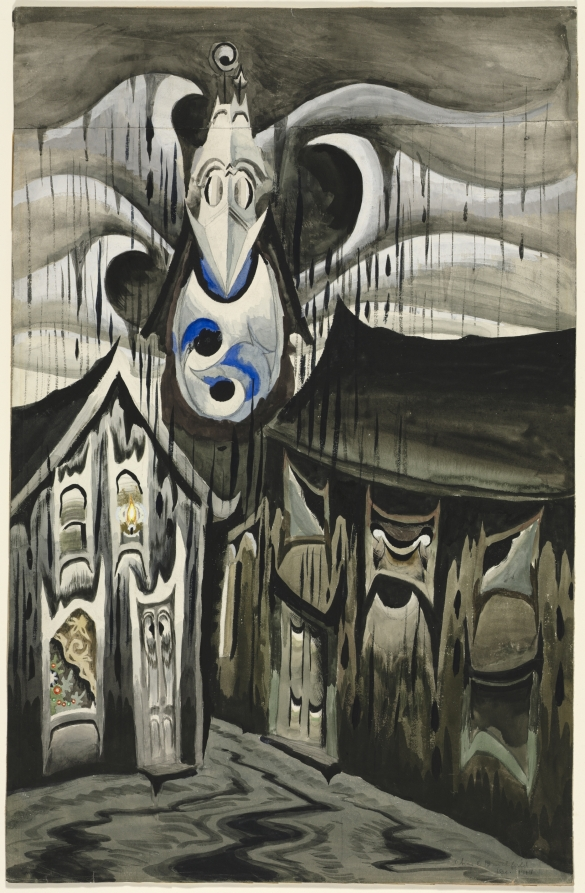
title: Church Bells Ringing, Rainy Winter Night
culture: America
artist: Charles Burchfield (American, 1893–1967)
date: December 1917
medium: watercolor and gouache over graphite on wove paper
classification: Drawing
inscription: signed, at lower right, in graphite: Chas E Burchfield / Dec. 1917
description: Burchfield considered this drawing among the greatest accomplishments of his “golden year.” This period followed a time of self-doubt and uncertainty: after graduating from the Cleveland School of Art, Burchfield enrolled in the National Academy of Design in New York City, but dropped out after one day, returning to Salem to work an office job. He painted inexhaustibly during his breaks and at night, depicting Salem and its environs in an increasingly abstract style. Church Bells Ringing, Rainy Winter Night shows the spire of Salem’s Baptist church rising up between two houses. Burchfield hoped to express his powerful childhood fear of the bell’s ominous ring—which he described as “a dull roar . . . dying slowly & with a growl.” Hearing it on stormy winter nights, he huddled in his bed and calmed himself by thinking of Christmas, a practice suggested by the tree visible through a window in the drawing. Burchfield carefully refined the composition throughout the sketches seen in this gallery. The drawing’s mood is conveyed through gray tones and the buildings’ hulking forms. Burchfield also created a complex language of symbols entitled “Conventions for Abstract Thoughts,” that recurred throughout his work and represented universal emotions. The hooked forms surrounding the tower stood for “Fear,” for example, and the shapes of the houses’ doors and windows symbolize “Morbidness” and “Evil.” Developed fully in this drawing, these symbols dominated Burchfield’s work during the remaining several years he spent in Ohio.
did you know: Salem's Baptist Church, a central feature of Burchfield's composition, has since been destroyed by fire.